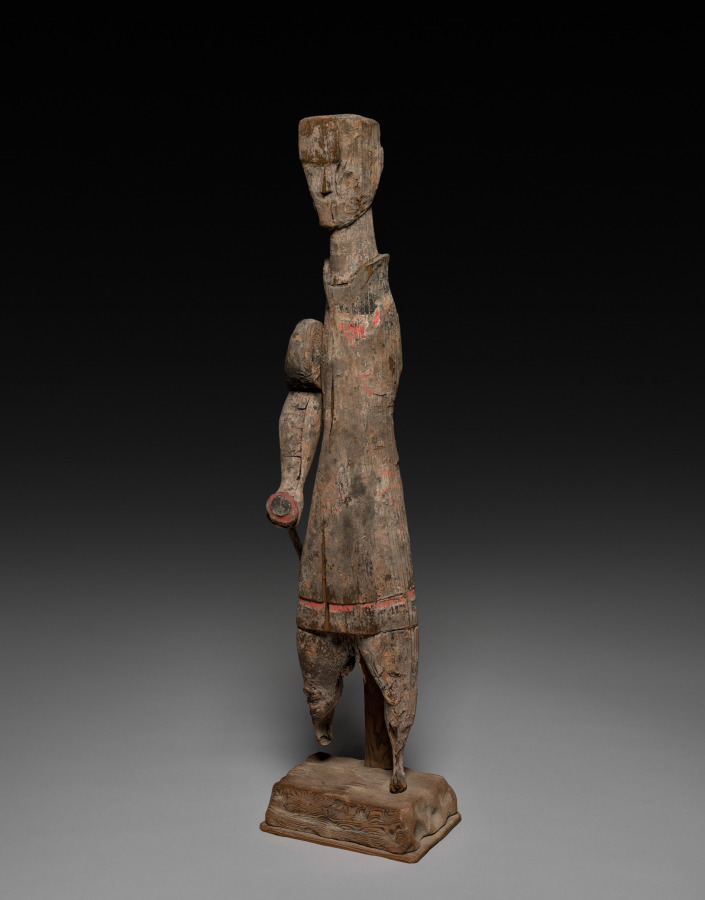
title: Figure with Sword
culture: China, Eastern Zhou dynasty (770–256 BCE), Warring States period (475–221 BCE)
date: 400–300 BCE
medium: wood with traces of polychromy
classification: Sculpture